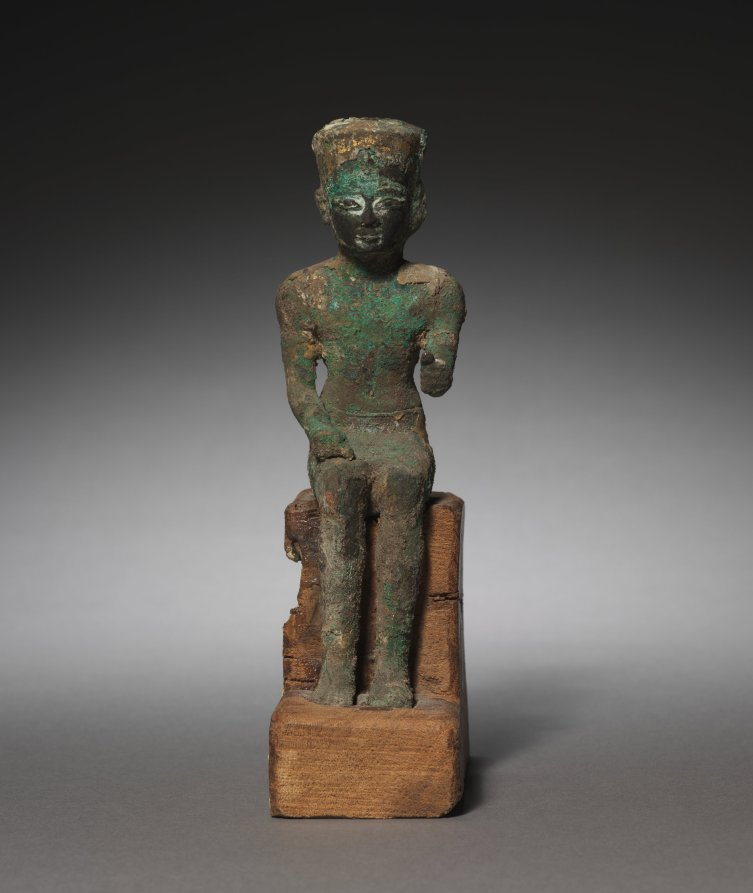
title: Statuette: Seated Amen-Ra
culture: Egypt, Late period (715–332 BCE), Dynasties 25–26(?)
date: 715–525 BCE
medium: bronze and black copper, gilded and inlaid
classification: Sculpture